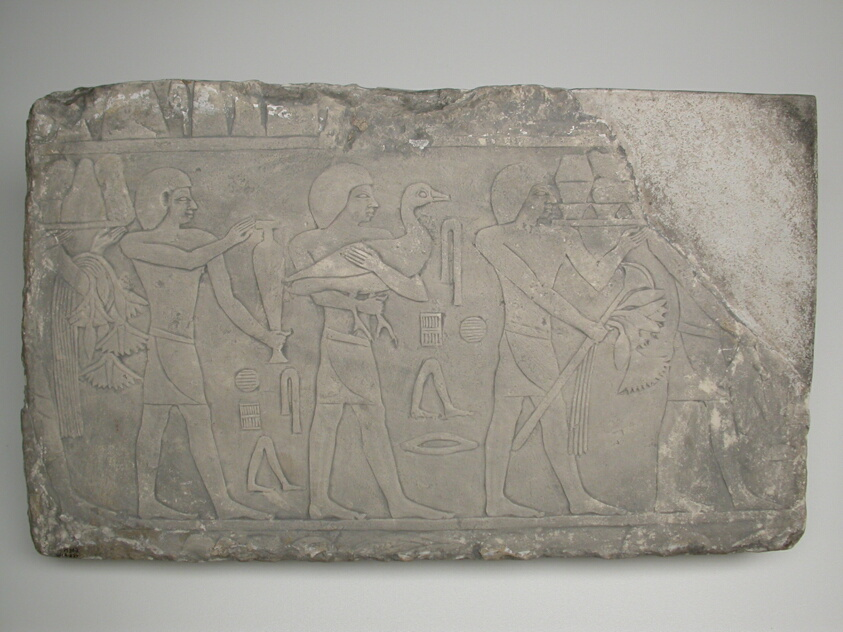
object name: Architectural fragment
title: Wall Fragment from a Tomb Depicting Offering Bearers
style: old kingdom, egyptian, fifth dynasty, ancient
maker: Egyptian; Saqqara, tomb of Akhethotep (?)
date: Old Kingdom, Dynasty 5 (about 2494–2345 BCE)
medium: Limestone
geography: Egypt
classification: architectural fragment; stone; sculpture; ancient art; relief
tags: men, geese, Hieroglyphs, funerary art, food, flowers